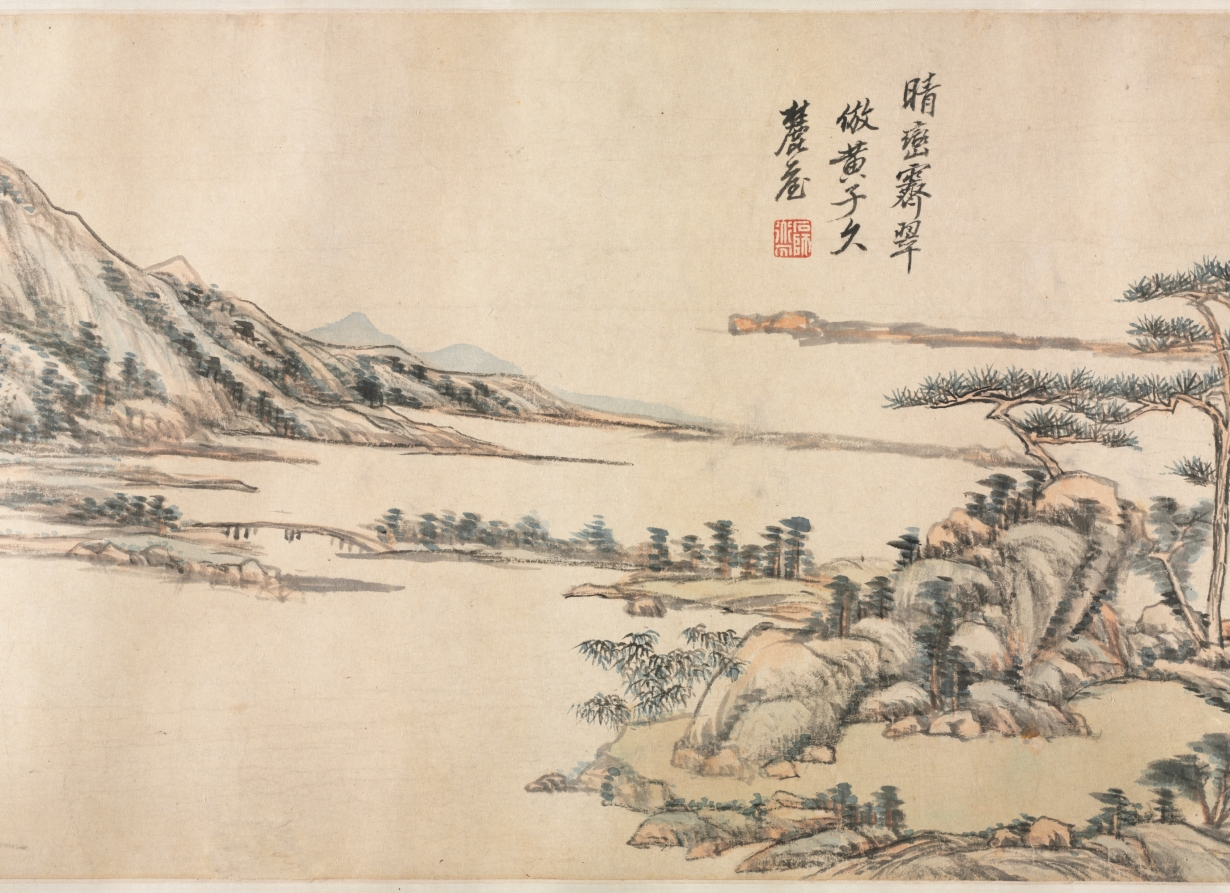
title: Green Peaks under Clear Sky: After Huang Gongwang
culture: China, Qing dynasty (1644-1911)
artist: Wang Yuanqi (Chinese, 1642–1715)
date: 1703–8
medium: handscroll; ink and light color on paper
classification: Painting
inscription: 晴巒霽翠：倣黃子久。麓臺。[印]石師道人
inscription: [印] 御書畫圖留與人看. 子久畫於宋諸大家荊、關、李、范、董、巨，無所不有。運筆不假修飾。皴法由淡入濃，化諸家之迹者也。澹明徐君偶見縮本，臨摹六幅。囑余參以富春大意，成一長卷。余夙夜在公，乘暇偶一點染。至戊子九秋告竣，閱四、五年矣。昔大癡為無用師作富春卷，七年而成，為千古鉅觀。今拙筆癡鈍。亦淹留至此。可為識者噴飯矣。王原祁題。[印]王原祁印; 麓臺 [印, 畫芯左下] 西廬後人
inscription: 3 additional colophons and 15 additional seals: 1 colophon and 9 seals of Yang Shicong 楊士驄 (b. 1870); 1 colophon of Wu Hufan 吳湖帆 (1894–1968); 1 colophon and 1 seal of Wu Mei (20th c.); 5 seals of Cheng Qi 程琦 (1911–1988).